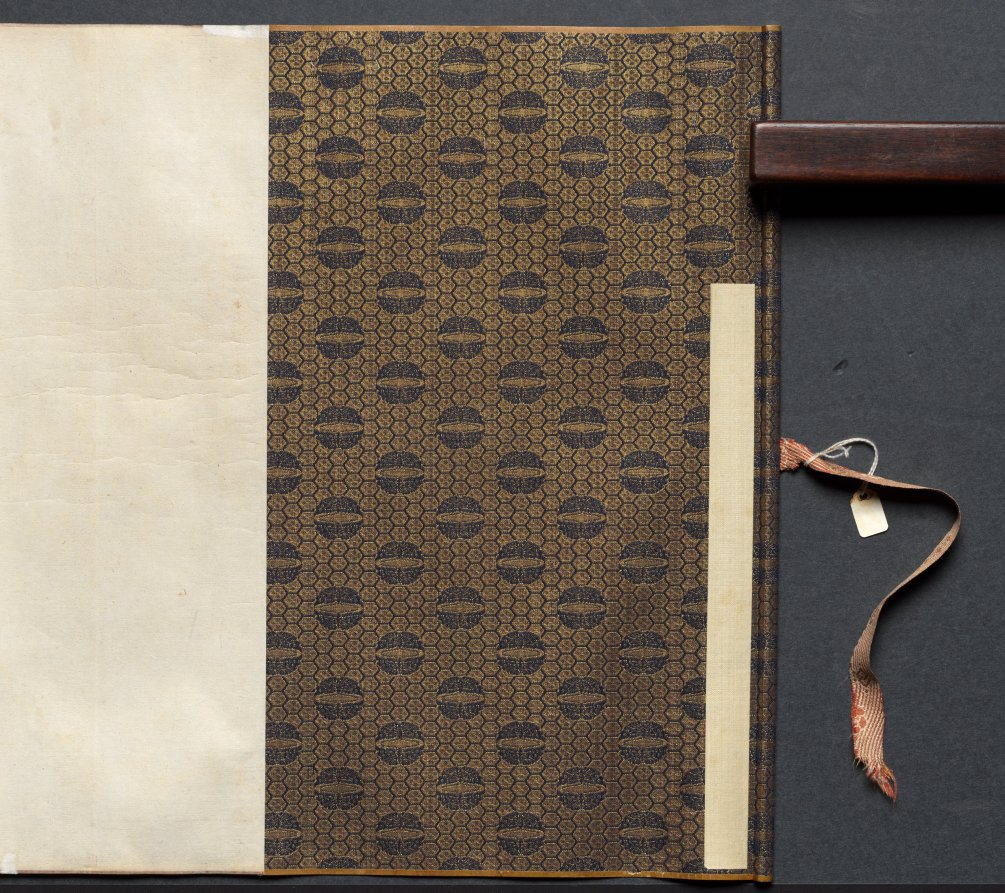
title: Returning to the Village in a Rainstorm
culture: China, Ming dynasty (1368–1644)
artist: Xie Shichen (Chinese, 1487–after 1567)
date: 1530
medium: Handscroll; ink and light color on silk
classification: Painting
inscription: 風雨歸村圖 嘉靖庚寅秋日樗仙謝時臣. [印] 謝時臣印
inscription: 3 additional seals unidentified.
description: This scroll depicts a wind- and rainswept landscape with figures in the countryside struggling against a late summer monsoon rainstorm. Such weather was familiar to residents of the lower Yangzi delta. Xie Shichen spent most of his life in the Suzhou area. Details of his career are scant, but his surviving works suggest that he made his living as a professional painter. This painting conveys drama and anecdotal observations, characteristic of Zhe school paintings, such as the one by Lü Wenying, CMA 1970.76.